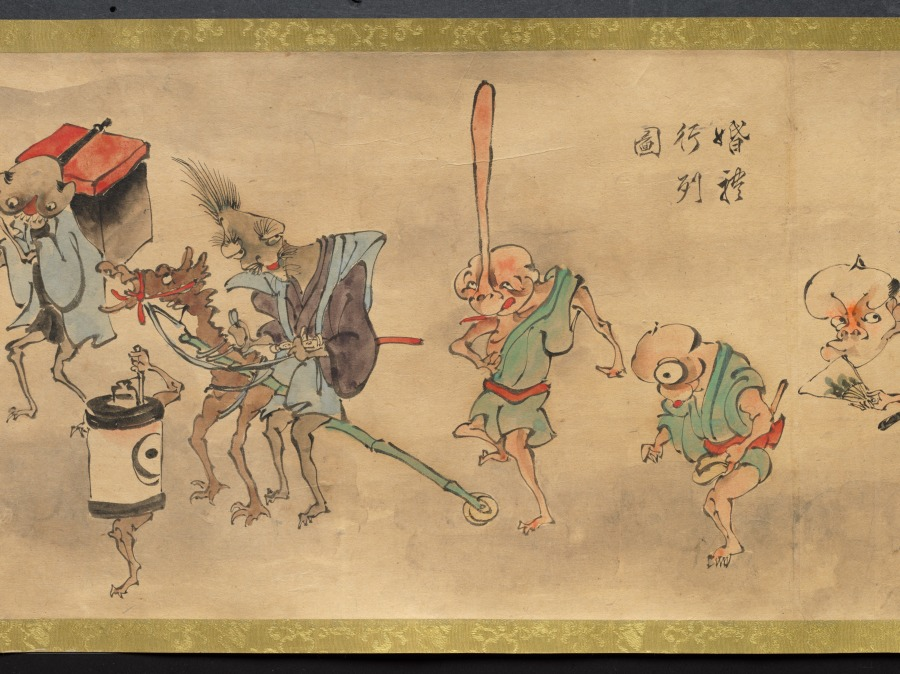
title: An Illustrated Marriage of Apparitions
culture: Japan, Edo period (1615–1868)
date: mid-1800s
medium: handscroll; ink and color on paper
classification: Painting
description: The matchmaking, engagement, wedding, and birth of the first child of two apparitions, or bakemono, literally "things that change," are illustrated in this whimsical, humorous handscroll. Japanese folklore abounds with such strange creatures, most famously represented in handscrolls featuring a procession of 100 supernatural monsters. Aside from a textual preface and cartouches indicating the content of the scenes, the tale is told visually. The artist and whereabouts of the original handscroll are unknown, but a number of other 19th-century copies by amateur painters exist in Japanese collections, attesting to its broad appeal.